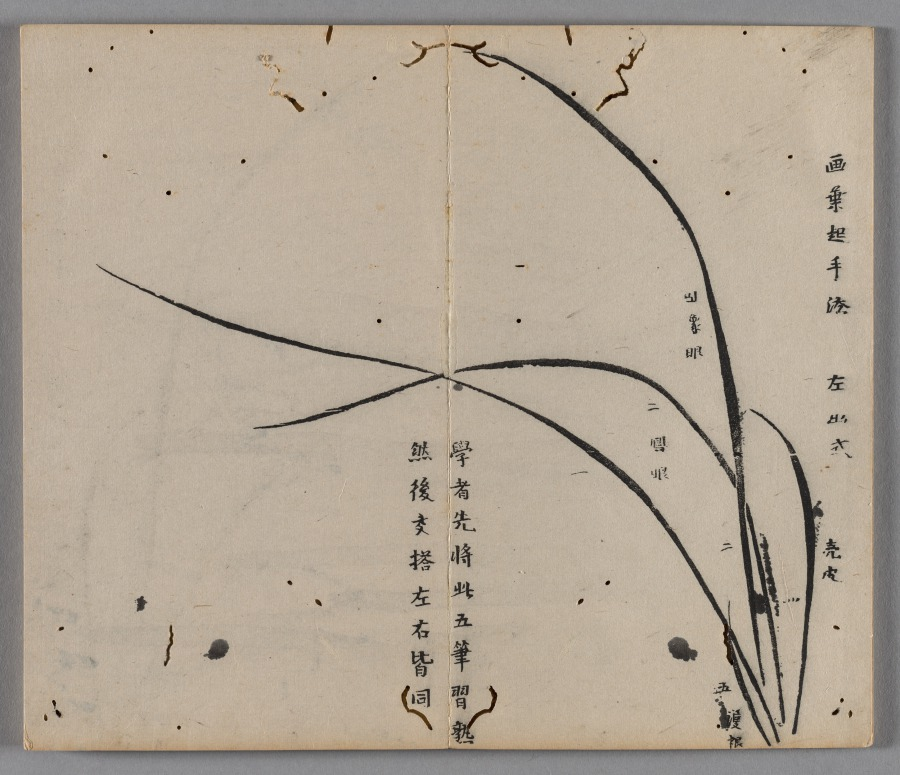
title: Ten Bamboo Studio Painting and Calligraphy Handbook (Shizhuzhai shuhua pu): Orchids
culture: China, Qing dynasty (1644-1911)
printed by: Hu Zhengyan (Chinese, c. 1584–1674)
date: 1633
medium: Woodblock-printed book; ink and colors on paper; first edition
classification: Print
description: Color printing reached a level of perfection in the early 1600s, as seen in this Ten Bamboo Studio Collection of Calligraphy and Painting and the Mustard Seed Garden Manual of Painting (printed 1679 and 1701). The painterly quality, precision in registering (aligning) the woodblocks, and harmonious colors made them the most successful color print editions in Chinese history. Both editions were printed and compiled in Nanjing, spread nationwide, and had a great impact on the arts in Japan and Korea.